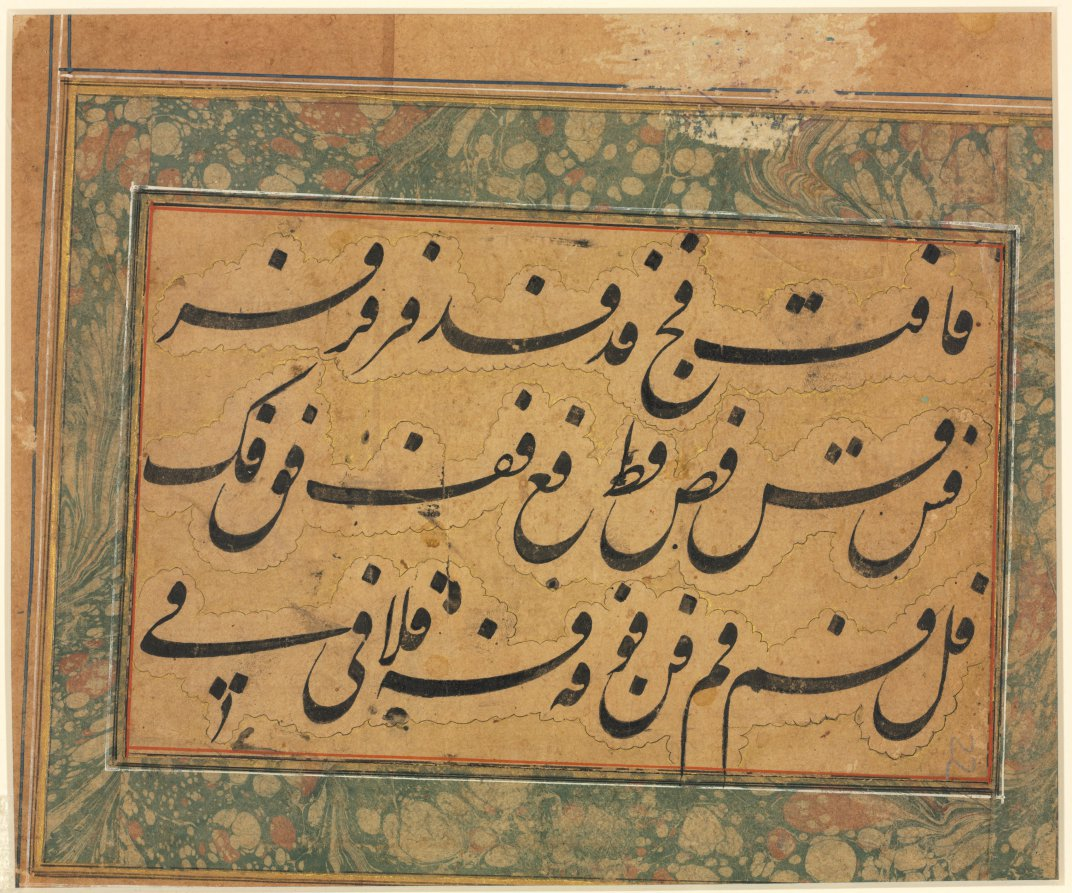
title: Sultan and Musicians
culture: Mughal India, Deccan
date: c. 1650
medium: Gum tempera and gold on paper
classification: Painting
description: The tone-on-tone pale mustard-yellow carpet and orange floor cushion furnish the terrace with a seat of honor for the figure dressed in white. The peacock-feather whisk held by an attendant behind him is an emblem of his royal status. Lying conspicuously before his knees, Muslim prayer beads mark him as a man of piety. He also partakes in courtly pleasures of hookah smoking and paan chewing. Green triangular paan packets consist of betel nut, lime, and flavorful aromatics such as cinnamon or coconut, wrapped in betel leaf. A brass spittoon by his side would be used for spitting throughout the enjoyable process of chewing the packets.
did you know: The two singers with open mouths may be performing a work by a mystic of the Sufi branch of Islam, given the essential role of music in Sufism and the pious mood of the all-male gathering.